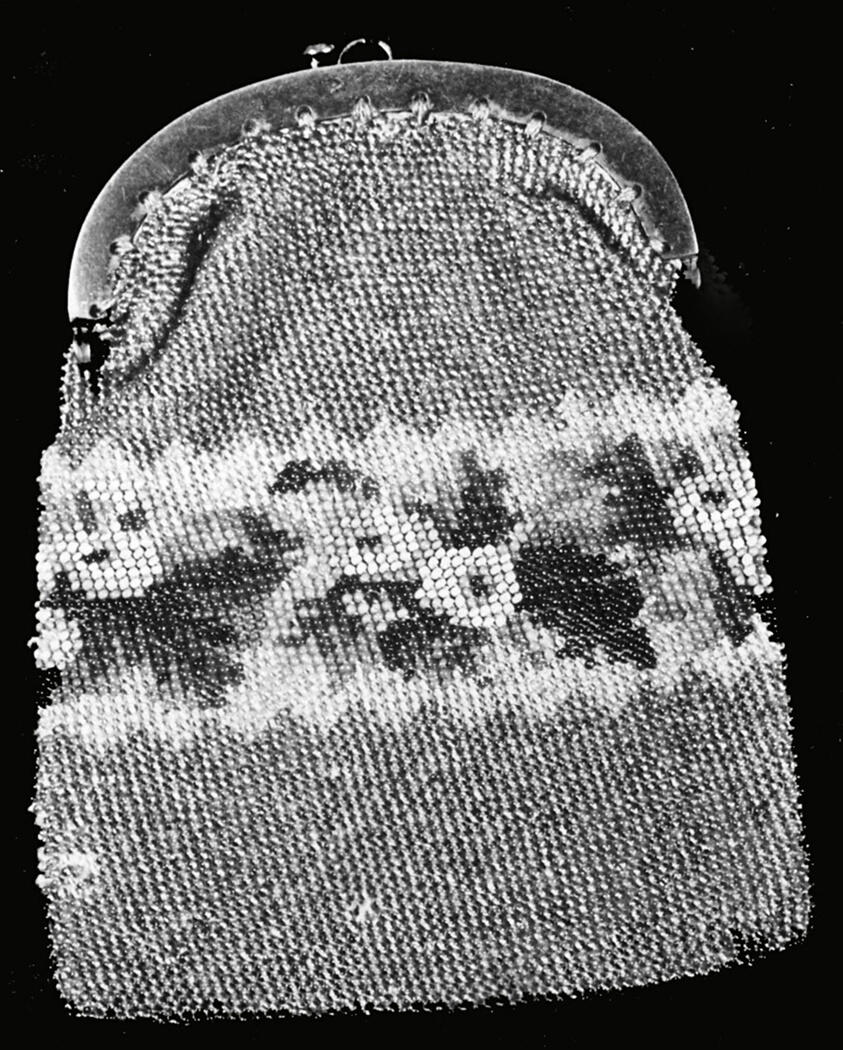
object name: Costume and Accessories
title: Bag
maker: France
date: 19th century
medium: Glass beads, transparent and opaque, round, worked in silk in buttonhole stitch with no foundation textile; lined; metal mount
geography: France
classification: textile; bag - needlework; costume accessory - bag; costume accessory; costume